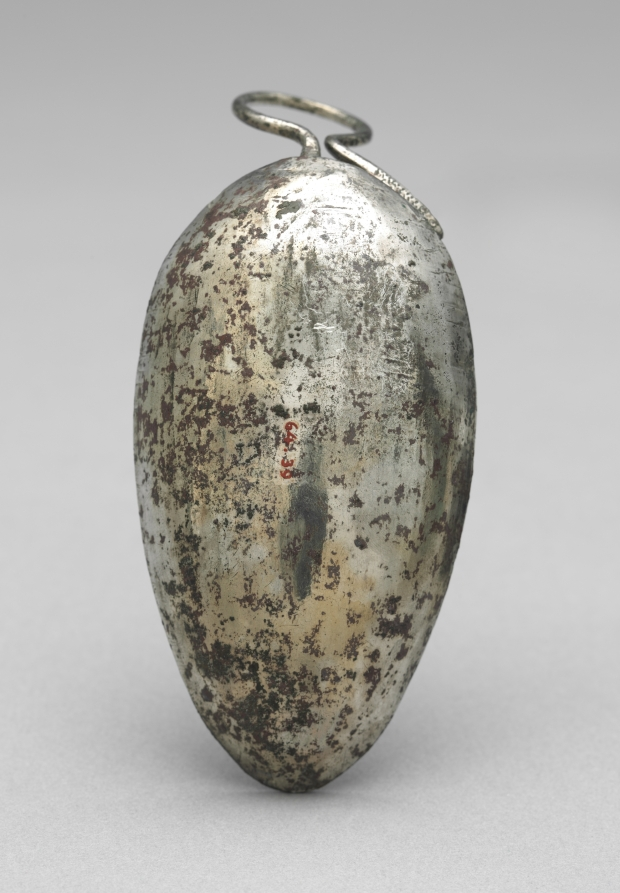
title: Spoon with Saint Paul as an Athlete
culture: late Roman Empire, perhaps Syria, early Byzantine, 4th century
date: 350–400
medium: silver, silver gilt, and niello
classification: Metalwork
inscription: the interior of the bowl contains an inscription filled with niello giving the Latin name of "PAVLVS."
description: Silver spoons with swan neck handles (ligulae) were popular in the Late Roman Empire. This late antique spoon is unique because it is decorated with the nude figure of a victorious athlete identified in an inscription as PAVLVS (Paul). It is tempting to interpret the juxtaposition of the name with a classical representation of an athlete as a subtle allusion to a passage in Saint Paul’s first letter to the Corinthians (1 Cor. 9:24-27), in which the apostle characterizes himself as an "athlete of Christ." While this interpretation may imply that the spoon’s owner was a Christian, it does not imply a religious function for the object, which was likely used for display or fine dining.